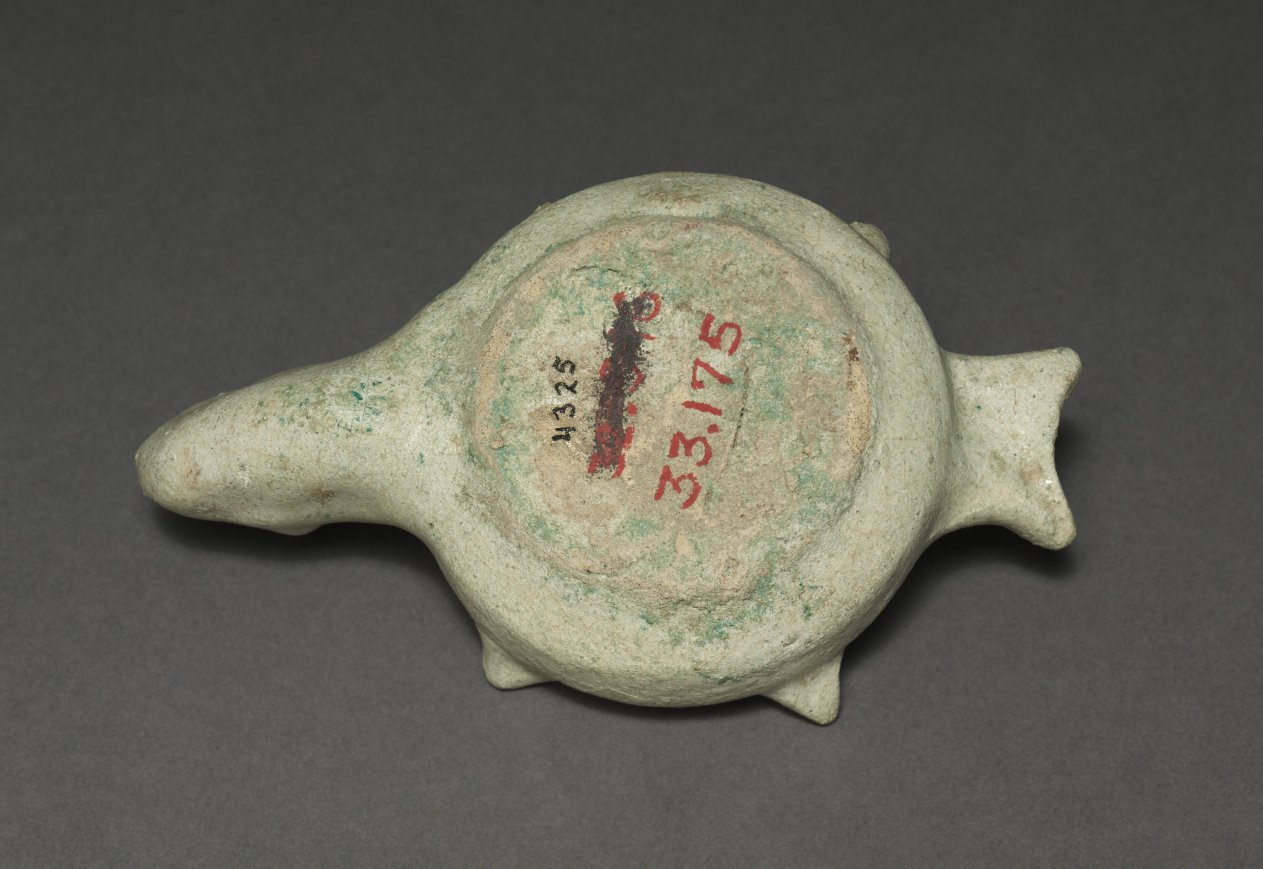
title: Lamp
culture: Parthian Empire (247 BCE–224 CE)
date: 1–200 CE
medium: terracotta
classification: Ceramic